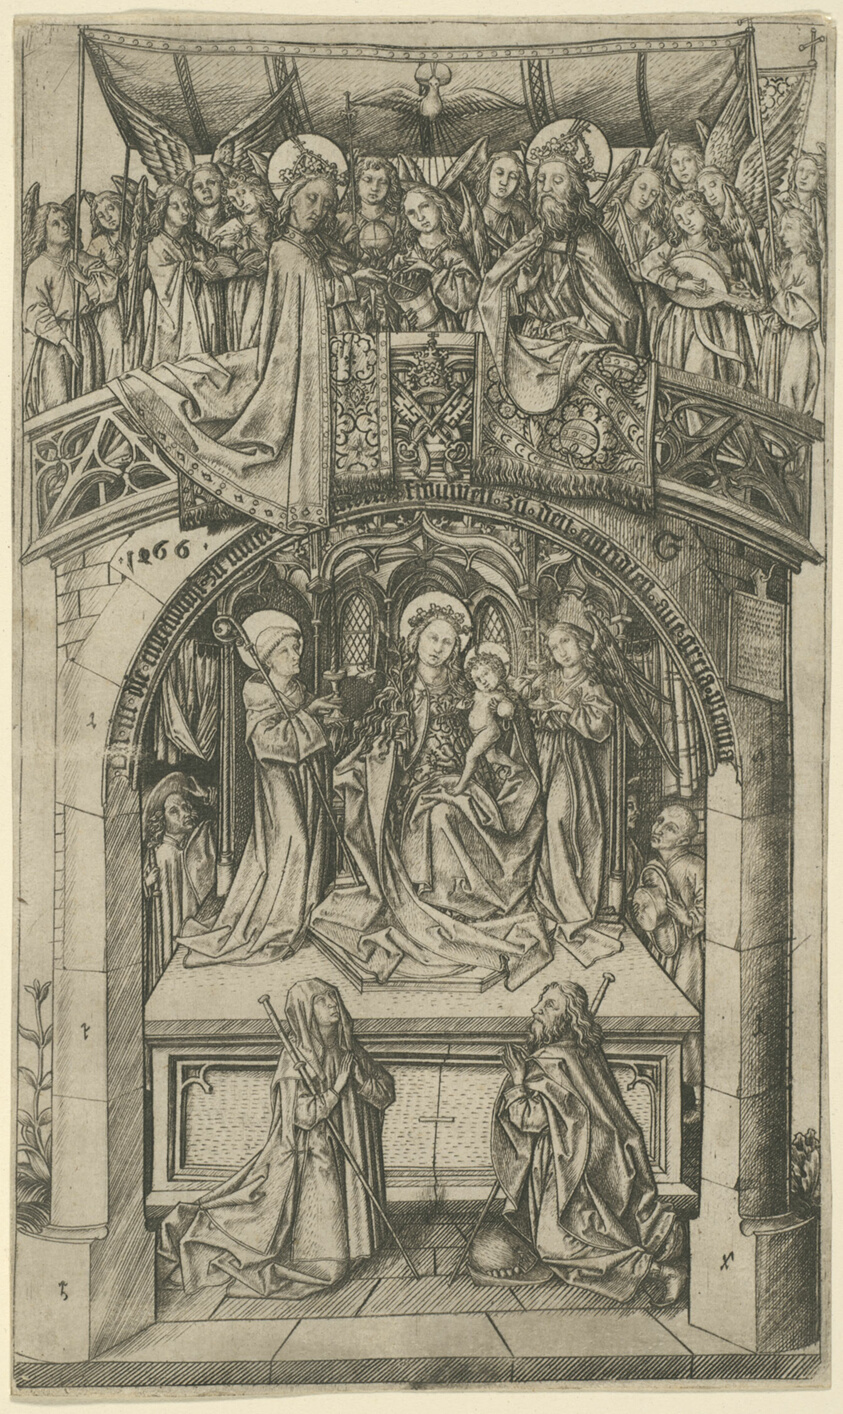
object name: Print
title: The Large Einsiedeln Madonna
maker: Master E. S.; German, active c. 1450-1467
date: 1466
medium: Engraving in black on ivory laid paper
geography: Germany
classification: engraving; print; prints and drawing